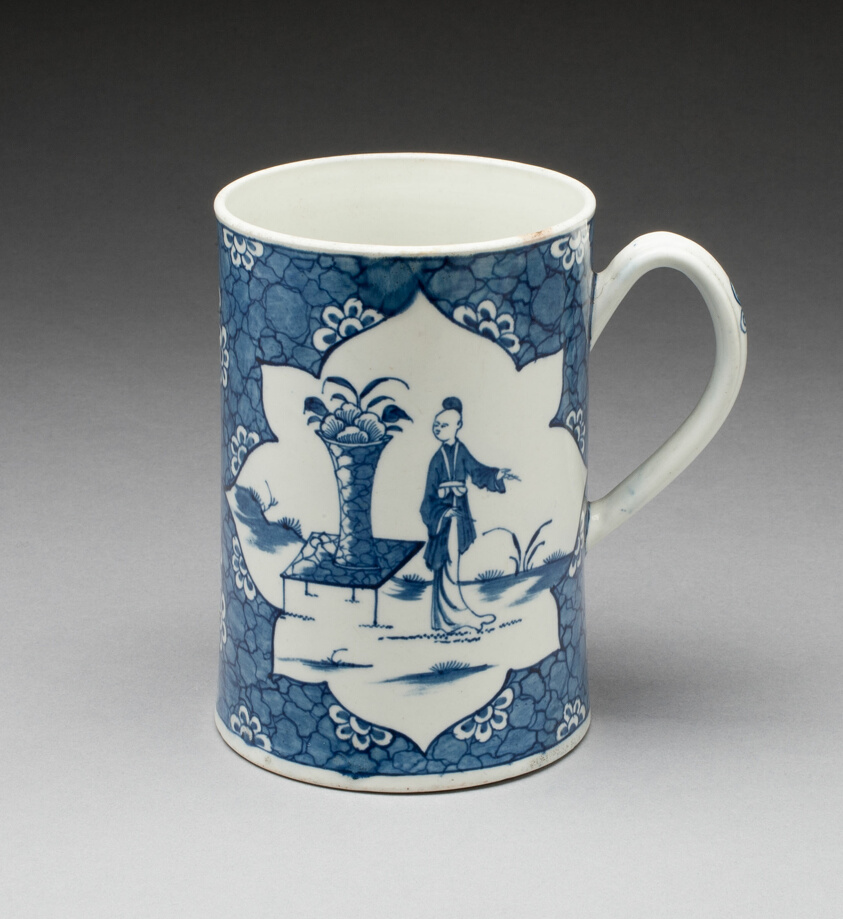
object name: Ceramics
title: Mug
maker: Worcester Porcelain Factory (Warmstry House Period, 1751–1783); Worcester, England, founded 1751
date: 1765/75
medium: Soft-paste porcelain, underglaze blue decoration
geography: Worcester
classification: ceramics; tableware; porcelain; european decorative arts